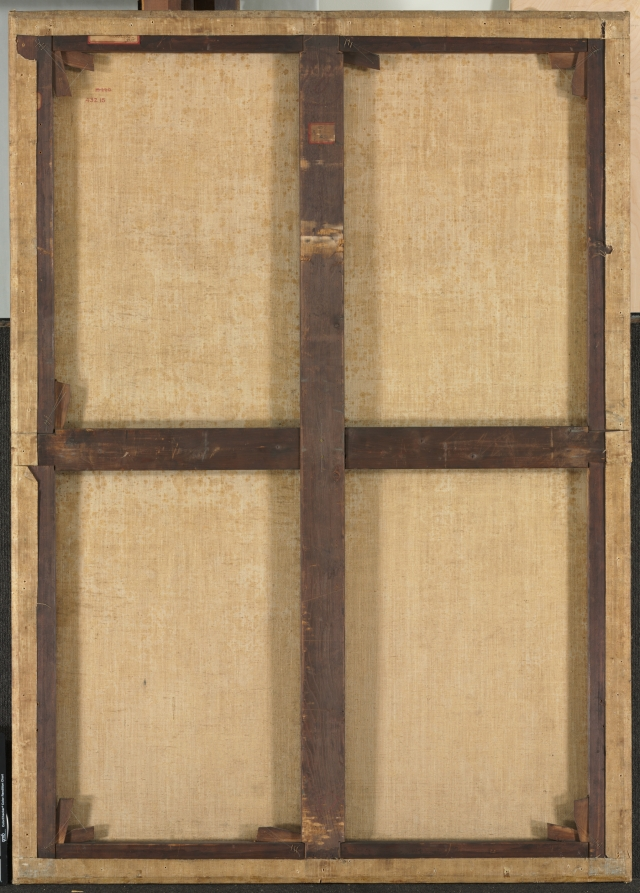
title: Rest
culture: France, 19th century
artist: William Adolphe Bouguereau (French, 1825–1905)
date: 1879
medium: oil on fabric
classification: Painting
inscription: Signed lower left: W. Bouguereau 1879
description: One of the most celebrated academic painters of his time, Bouguereau underscores the moral virtues of the Italian peasants in this painting by depicting the dome of St. Peter's in the distance. The idealized figures and their triangular grouping recall the Holy Family paintings by Renaissance master Raphael 400 years earlier. The painting was purchased directly from the artist by Cleveland banker and philanthropist Hinman B. Hurlbut in July 1879.